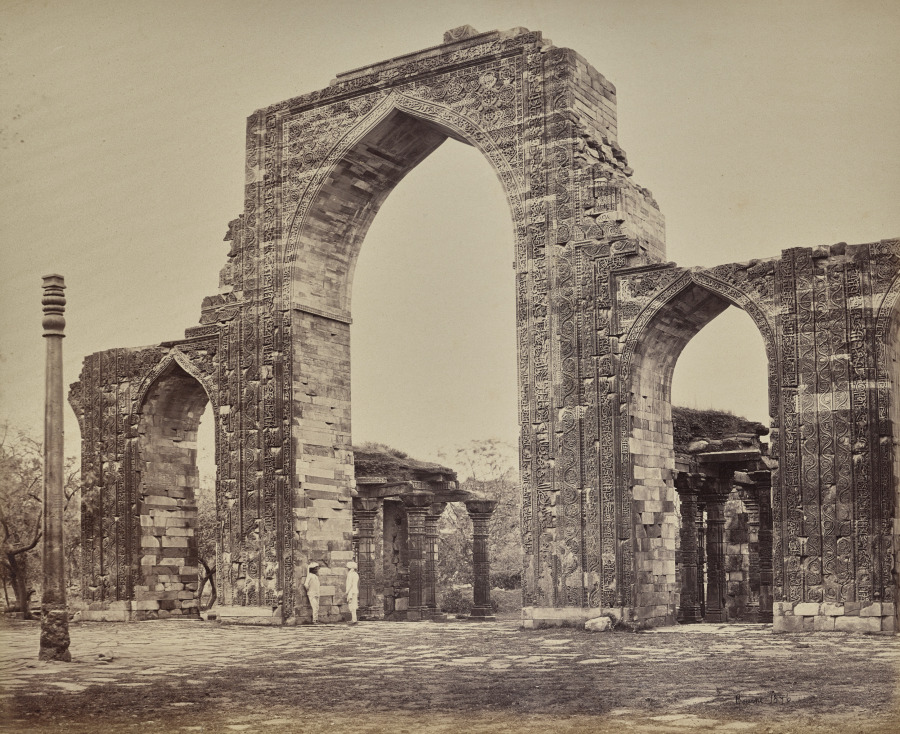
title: Delhi. Great Arch and Iron Pillar Near the Kootub Minar, Ruin of Old Delhi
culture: England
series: Photographs of Northern India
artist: Samuel Bourne (British, 1834–1912)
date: 1863–70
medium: albumen print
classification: Photograph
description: The 50 images in this album, all taken in the 1860s, move from the hill towns of the Himalayas down to cities including Lahore (now in Pakistan), Delhi, Lucknow, Agra, Benares (now Varansi), and Calcutta (now Kolkata). Architectural studies of major monuments offer valuable historical records of what sites such as the Taj Mahal and the imperial mosque of the Mughal emperors in Delhi looked like before twentieth-century restorations.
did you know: Samuel Bourne, the author of most the images in this album, was a banker in England before he moved to India to become a professional photographer.